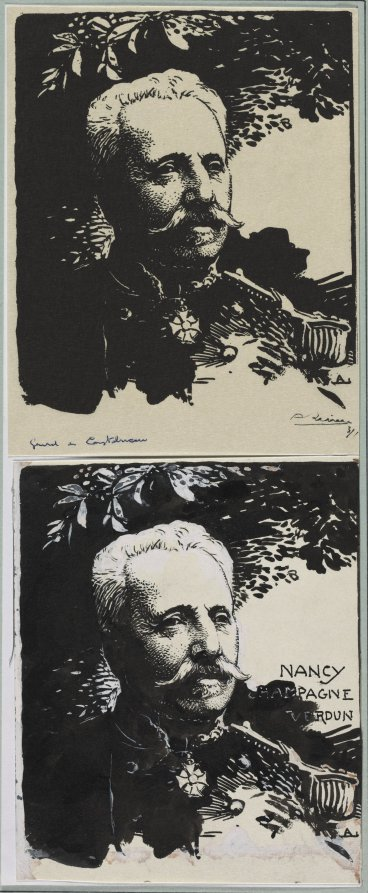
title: Général de Castelneau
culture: France, 20th century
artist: Auguste Louis Lepère (French, 1849–1918)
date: 1914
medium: brush and black ink heightened with white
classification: Drawing